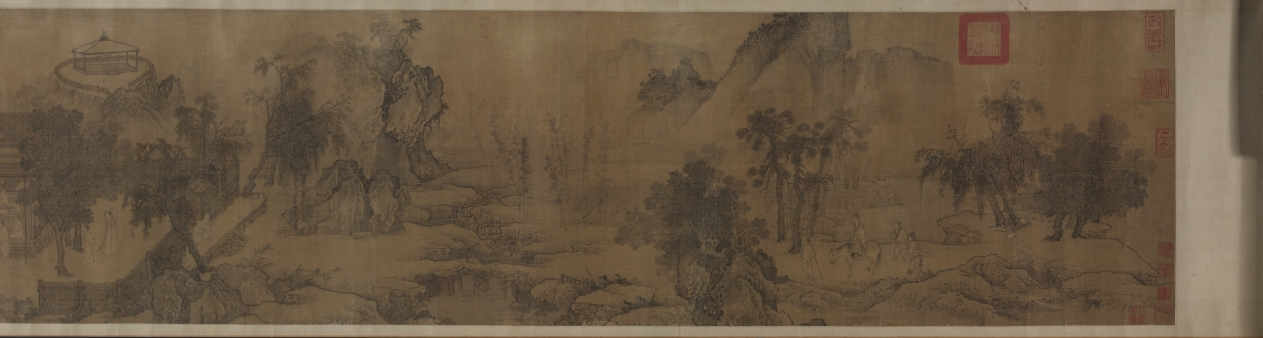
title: Tao Yuanming's Return Home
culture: China, Yuan dynasty (1271-1368)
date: 1300s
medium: Handscroll; ink and slight color on silk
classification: Painting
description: Tao Yuanming's revered poem "Return Home 歸去來辭 (Gui qu lai ci)" powerfully conveys his desire to leave bureaucratic life for the simplicity and authenticity of nature. This sentiment has deeply resonated with generations of Chinese scholars, making it a popular theme in paintings. This handscroll uses continuous narrative depicting Tao in multiple scenes from the poem. Starting on the right, the poet travels to his home. His children wait by the gate, while his wife pauses to tidy her hair before welcoming him. Then, free from the burdens of official service, Tao spends time in both nature and his cottage, where he can again enjoy wine, music, and books.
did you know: Poet Tao Yuanming 陶淵明 (c. 365–427 CE) returned to a secluded life instead of pursuing a civil service career.